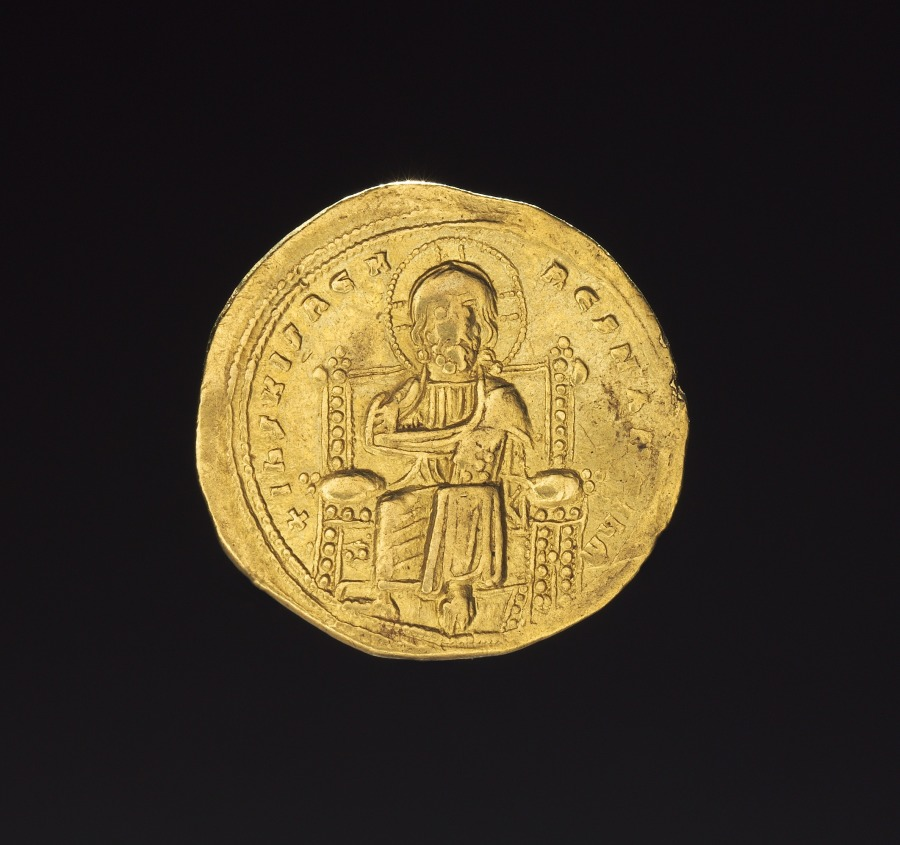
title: Histamenon of Romanus III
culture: Byzantium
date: 1028–34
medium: gold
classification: Coins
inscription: IhS XIS R?X R?GNANTInm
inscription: ?C? ?ON? R?MAn?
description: Romanus III Argyrus (968–April 11, 1034) was Byzantine emperor from November 15, 1028, until his death. He was husband of Zoe, the daughter of Constantine VII, the man Romanus was to succeed as emperor three days after wedding the daughter. He appears to have thought a lot of himself and his abilities, but in fact was inept, corrupt, and self-absorbed. His government was filled with corruption and mismanagement. He made the mistake of ignoring his wife Zoe and limiting her expenses in an effort to reduce expenditures. This would prove fatal to him as he was either poisoned or drowned (accounts differ) by the hand or order of his wife.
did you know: On one side is a seated figure of Christ enthroned, on the other the Virgin is shown touching the head of emperor Romanus III.